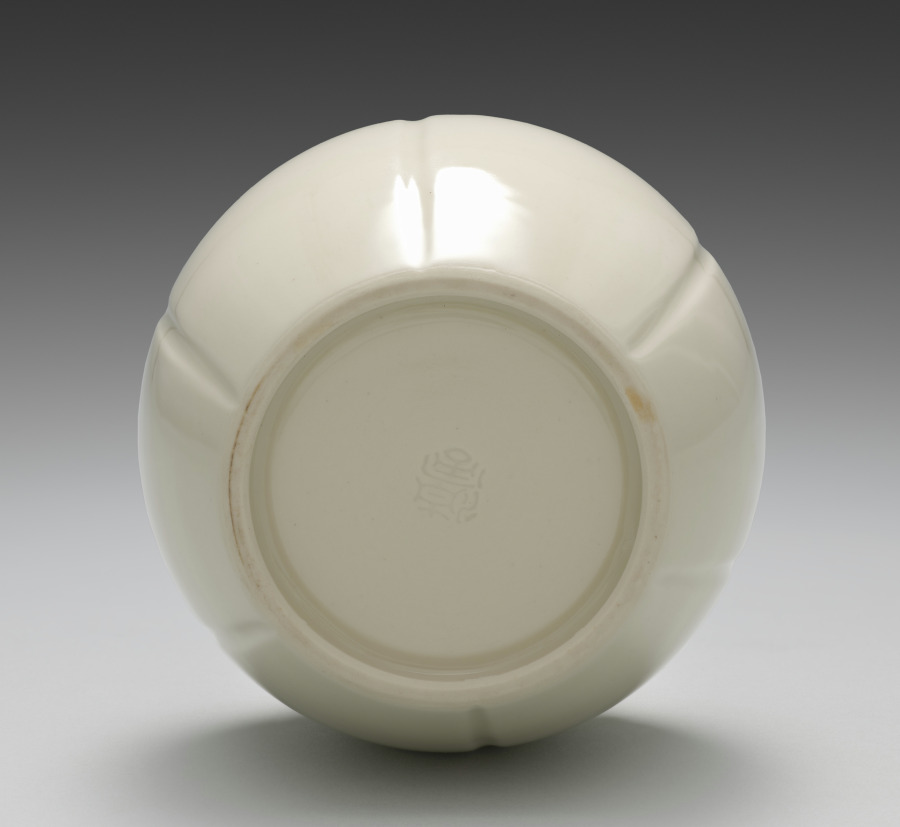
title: Container from Lit Charcoal and Ash Containers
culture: Japan, Meiji period (1868–1912)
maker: Seifū Yohei III (Japanese, 1851–1914)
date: 1893–1914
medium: One from a set of four containers; porcelain with molded design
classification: Ceramic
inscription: 清風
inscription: The storage box for this set is inscribed and impressed with seals.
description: The box lid for these six-lobed lit charcoal and ash containers, or hiire, identifies them as kōhakuji, another of Yohei III’s translucent cream colors over ivory clay bodies. One might translate the name as “lustrous pearl[–glazed ivory] porcelain.” A hiire was filled with ash with burnt coals at the center so that embers and tobacco ash could be discarded safely during a gathering. Each of the lobes on the containers has a round protrusion set below the rim. The studlike pattern is called ruiza. The term is also used to describe the pattern that rings the shoulder of some flower vases or metal kettles used in chanoyu.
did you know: The Seifu studio generally followed the standard practice in Japan for identifying the artist and object in box inscriptions.